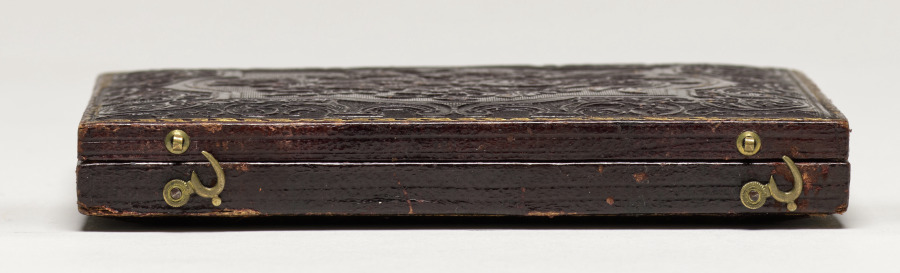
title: Dead Child On a Sofa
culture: America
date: c. 1855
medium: daguerreotype, applied color, quarter-plate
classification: Photograph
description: This carefully staged daguerreotype of a dead child is an outstanding example of a very common subject: the postmortem portrait. Using the stylistic conventions of the day, the unidentified artist successfully created a visually pleasing scene, despite the nature of the image. Dressed in white with a bouquet of flowers on the chest, the child, seen in profile, reclines on an elaborately patterned sofa. Delicate flesh tones were added to the cheek and arm, suggestive of a healthy child sleeping. The high rate of infant mortality throughout the 19th century made this variety of portraiture common, satisfying the emotional need of the parents to have a lasting memory of a loved one.